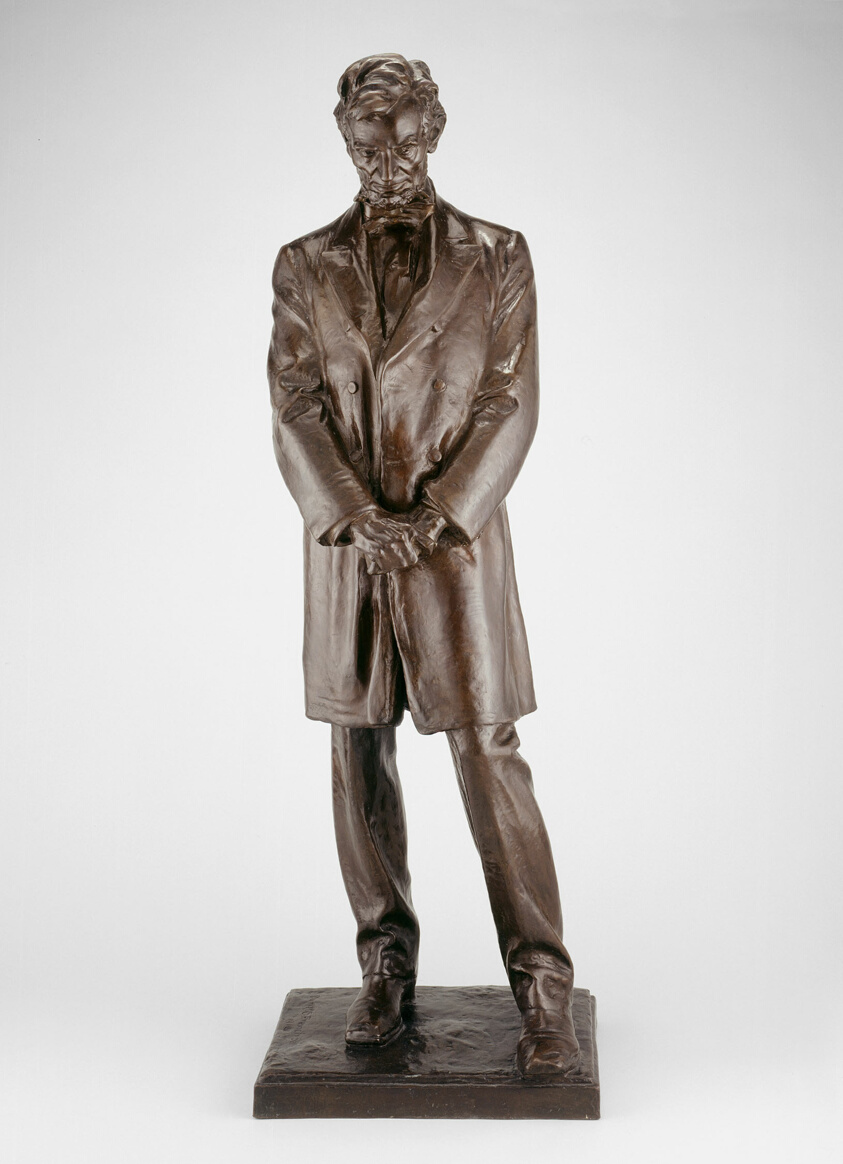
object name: Sculpture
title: Abraham Lincoln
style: Realism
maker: Daniel Chester French (American, 1850–1931); Cast by Roman Bronze Works (American, founded 1897)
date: Modeled 1912, cast after 1912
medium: Bronze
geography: United States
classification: sculpture; american arts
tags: people, portraits